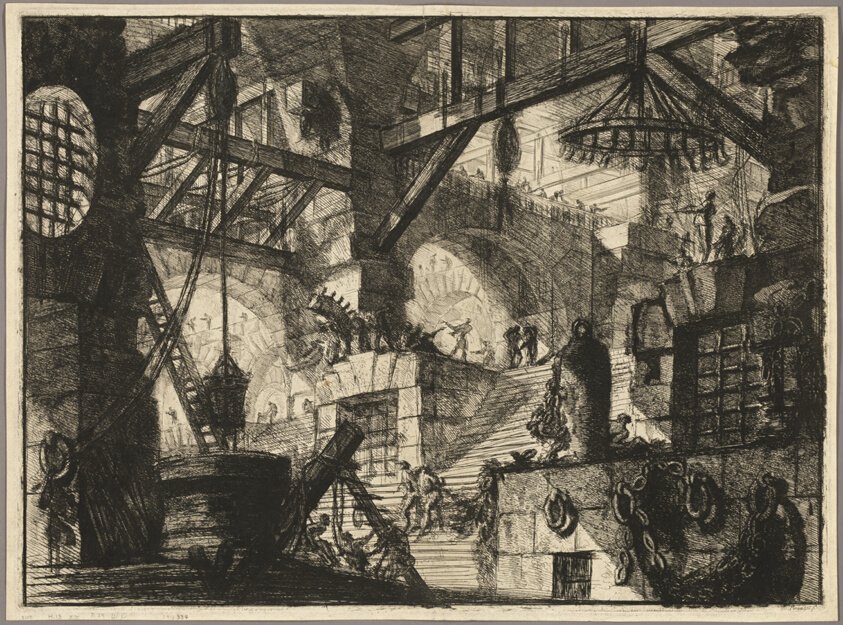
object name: Print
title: The Well, plate 13 from Imaginary Prisons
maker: Giovanni Battista Piranesi (Italian, 1720-1778)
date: 1761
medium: Etching and engraving on heavy ivory laid paper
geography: Italy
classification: etching; print; prints and drawing